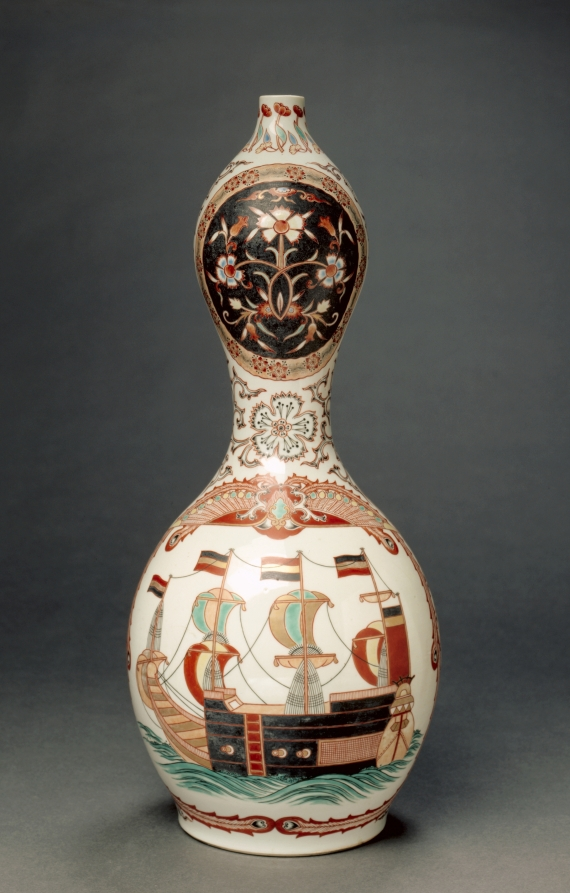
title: Bottle with Western Ships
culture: Japan, Edo period (1615–1868)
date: c. 1800–1868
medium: Porcelain with decoration in colored enamels and underglaze blue, overglaze enamels, and gold (Hizen ware, Arita type)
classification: Ceramic